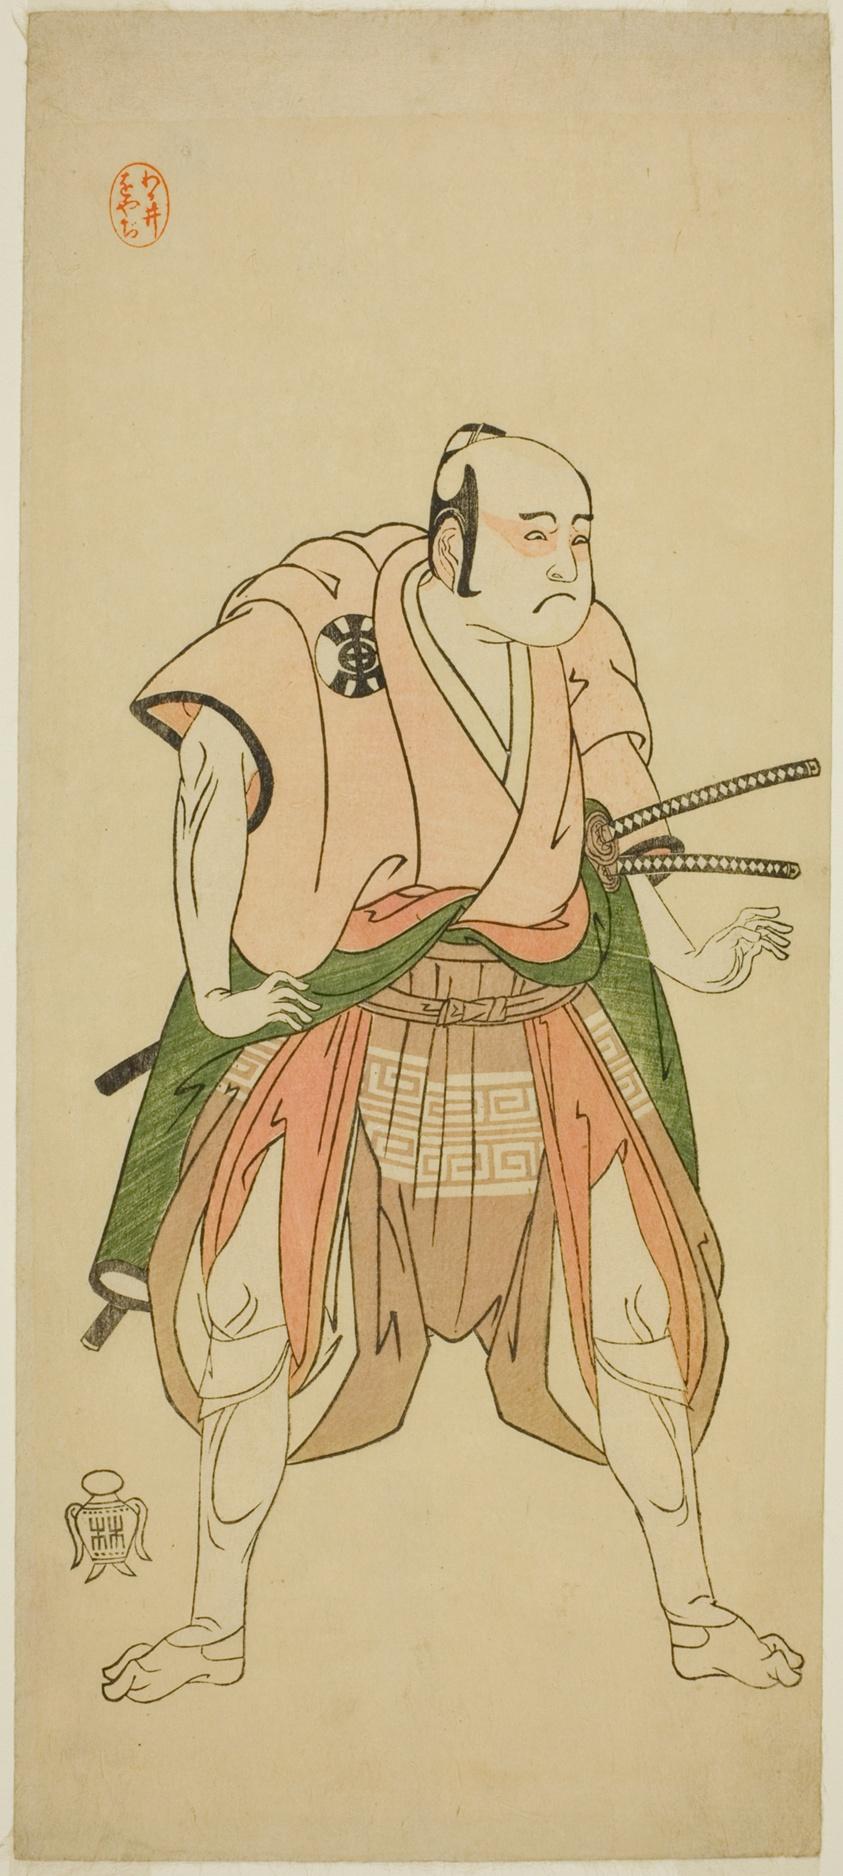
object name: Print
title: The Actor Bando Sampachi I as Yawata no Saburo (?) in the Play Shuen Soga Omugaeshi (?), Performed at the Ichimura Theater (?) in the Second Month, 1768 (?)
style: Japanese (culture or style)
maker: Katsukawa Shunsho 勝川 春章; Japanese, 1726-1792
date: c. 1768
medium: Color woodblock print; hosoban; probably one sheet of a five-sheet print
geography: Japan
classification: woodblock print; print; asian art